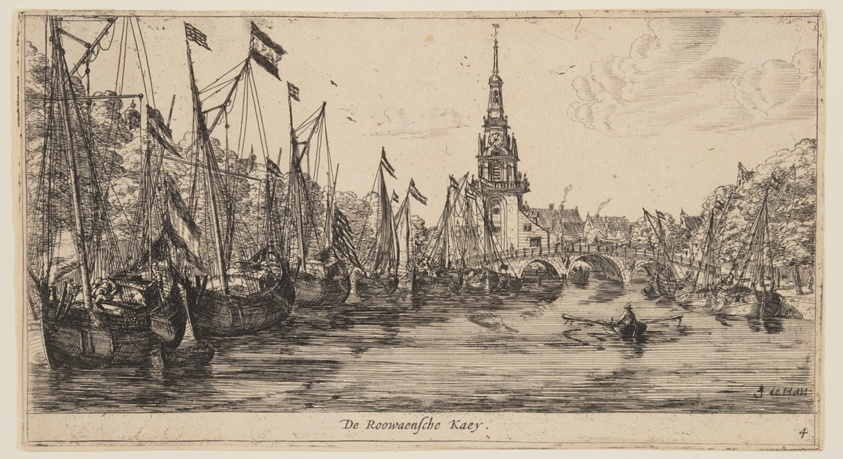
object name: Print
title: De Roowaensche Kaey, from Views of Amsterdam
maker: Reinier Nooms, called Zeeman (Dutch, c. 1623–1664)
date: c. 1660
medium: Etching on ivory laid paper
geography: Netherlands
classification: etching; paper; print; prints and drawing